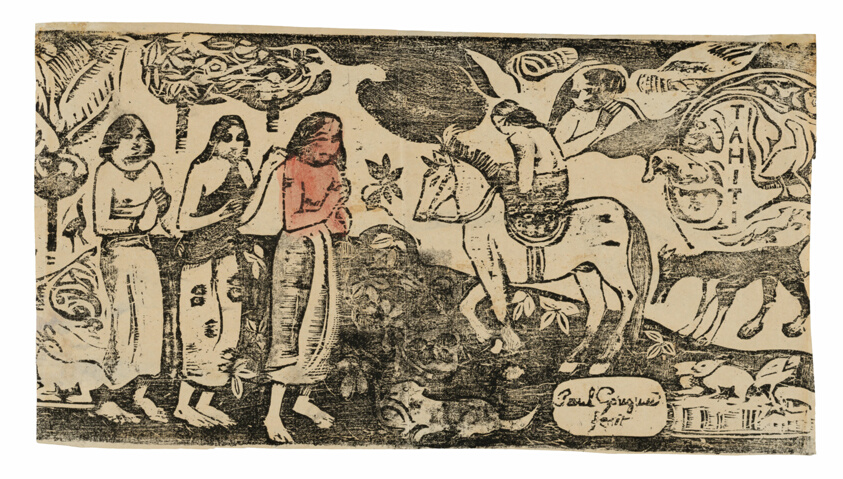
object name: Print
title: Change of Residence, from the Suite of Late Wood-Block Prints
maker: Paul Gauguin (French, 1848-1903)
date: 1899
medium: Wood-block print in black ink, with touches of red and black watercolor, on cream wove paper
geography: France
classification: woodcut; print; prints and drawing